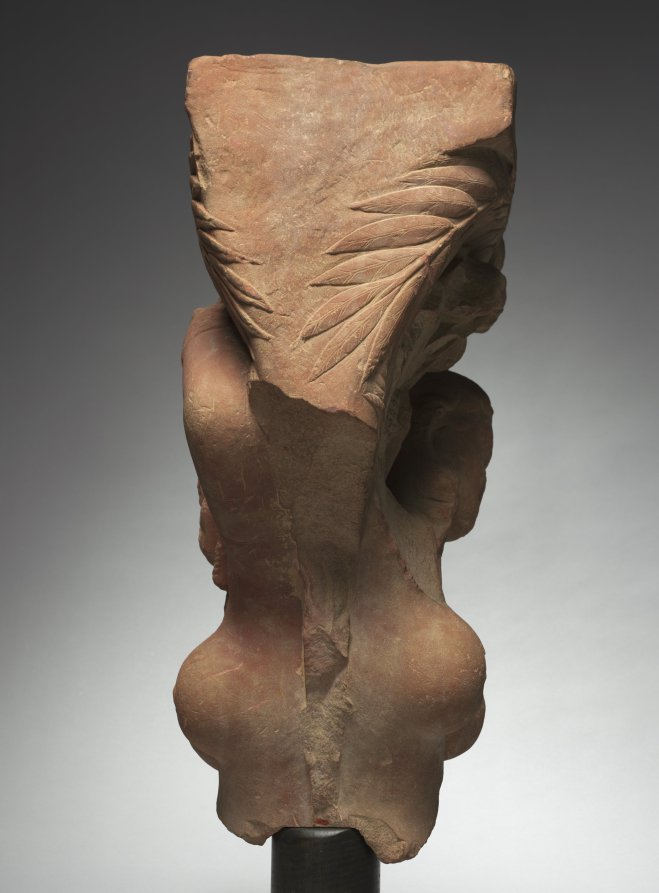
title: Gateway Bracket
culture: India, Mathura, Kushan period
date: 150–200 CE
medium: sandstone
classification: Sculpture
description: Gateways leading into a sacred area often had large horizontal architraves, the weight of which was supported by brackets carved with figures of voluptuous women grasping the branch of a tree. They embody the ideal form of the young mother, with breasts full of nourishing milk. As personifications of the sap that pervades living plants, they are auspicious markers of life and abundance. These attractive figures, who embody the purifying water essential for life, symbolically cleanse visitors as they enter the sacred space. On both sides of this large bracket they grasp the branch of an ashoka tree, which has clusters of flowers that are bright red in nature.